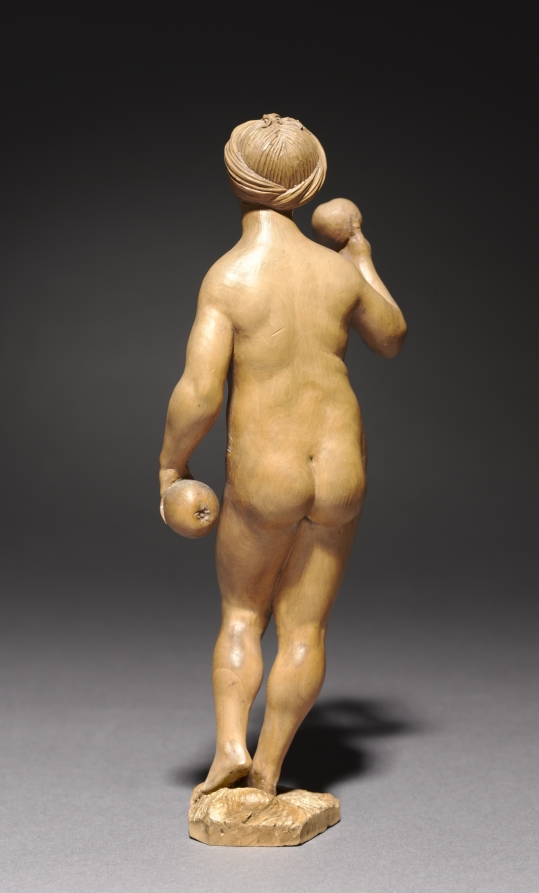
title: Eve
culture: Germany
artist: Daniel Mauch (German, 1477–1540)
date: c. 1535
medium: boxwood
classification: Sculpture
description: Mauch straddled the late medieval and Renaissance traditions across his career. These small-scale statuettes, however, each made from a single piece of boxwood, stem from the most progressive strands of Renaissance art in southern Germany, closely connected to developments in both Italian and German bronze sculpture. The bodies reveal Mauch's careful study of human anatomy as well as a rapport with Albrecht Dürer's well-known print of the same subject.